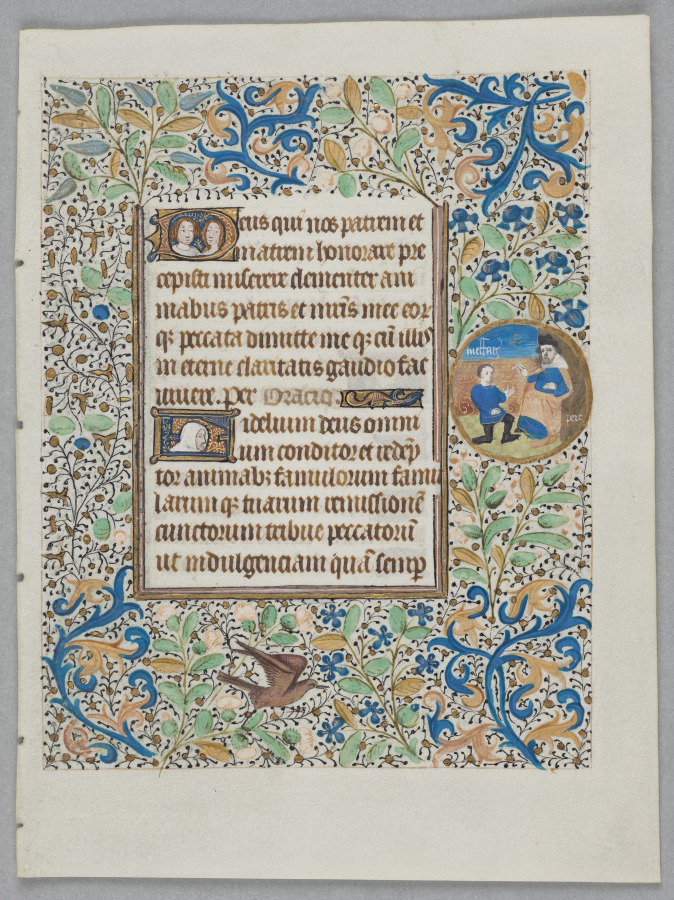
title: Leaf from a Book of Hours: Office of the Dead Opening Prayers (recto)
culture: France, Paris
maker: circle of Coëtivy Master (French)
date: c. 1460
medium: Ink, tempera and gold on vellum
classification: Manuscript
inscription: DEUS, qui nos patrem et matrem honorare pra- ecepisti miserere clementer ani- mabus patris et matris meae eorum- que peccata dimitte meque eos in aeternae claritatis gaudio fac videre. Per Christum Dominum nostrum. Amen. Fidelium Deus omni- um conditor, et redemp- tor animabus famulorum, famu- larumque tuarum remissionem cunctorum tribue peccatorum: ut indulgentiam, quam semper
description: The leaf shows the life of St Alexis, a monk of the 300s. His veneration became popular in France since the 1100s when the French poem la Vie de saint Alexis was written. This text is regarded as one of the earliest examples in romance language written in French and not in Latin.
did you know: St. Alexis is depicted here as a courtly person of the 1400s to bring him close to the reader.